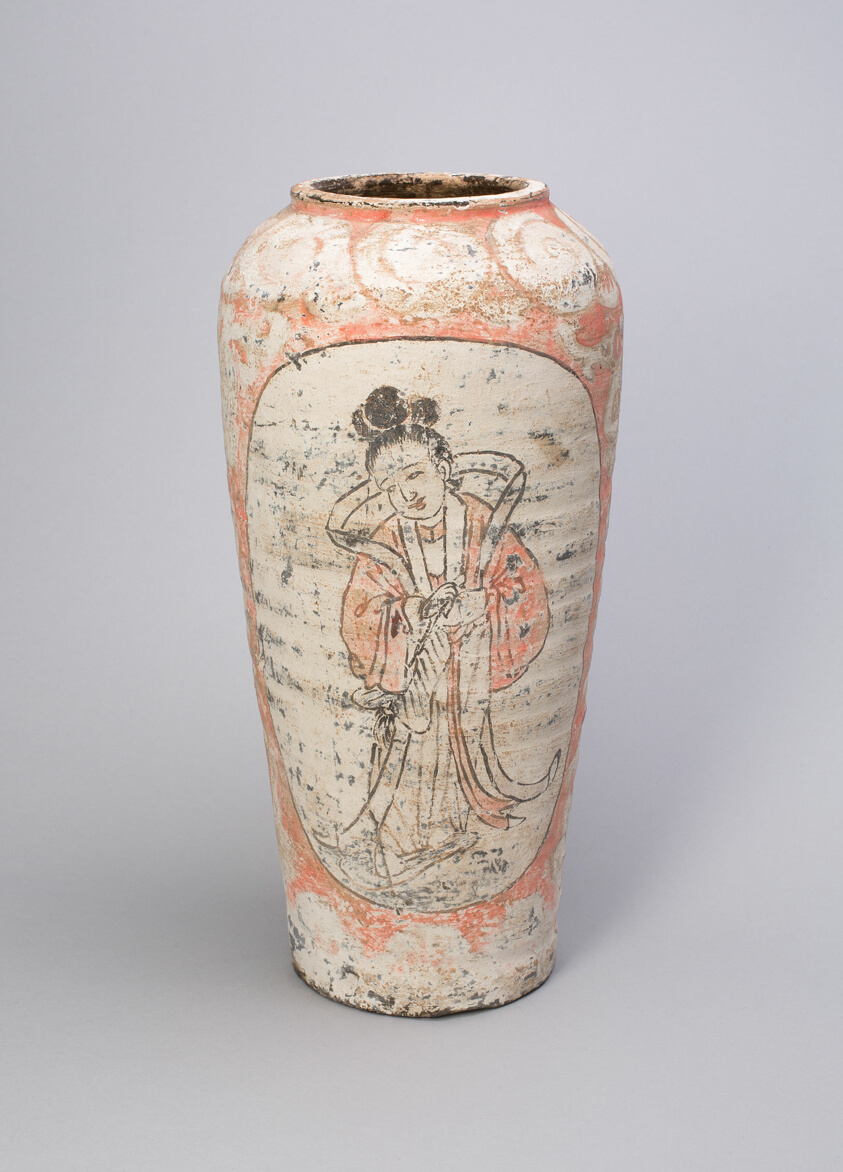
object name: Vessel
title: Jar with Two Figures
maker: China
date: Tang dynasty (618–906)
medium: Stoneware with slip and painted decoration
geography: China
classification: ceramics; asian art; vessel